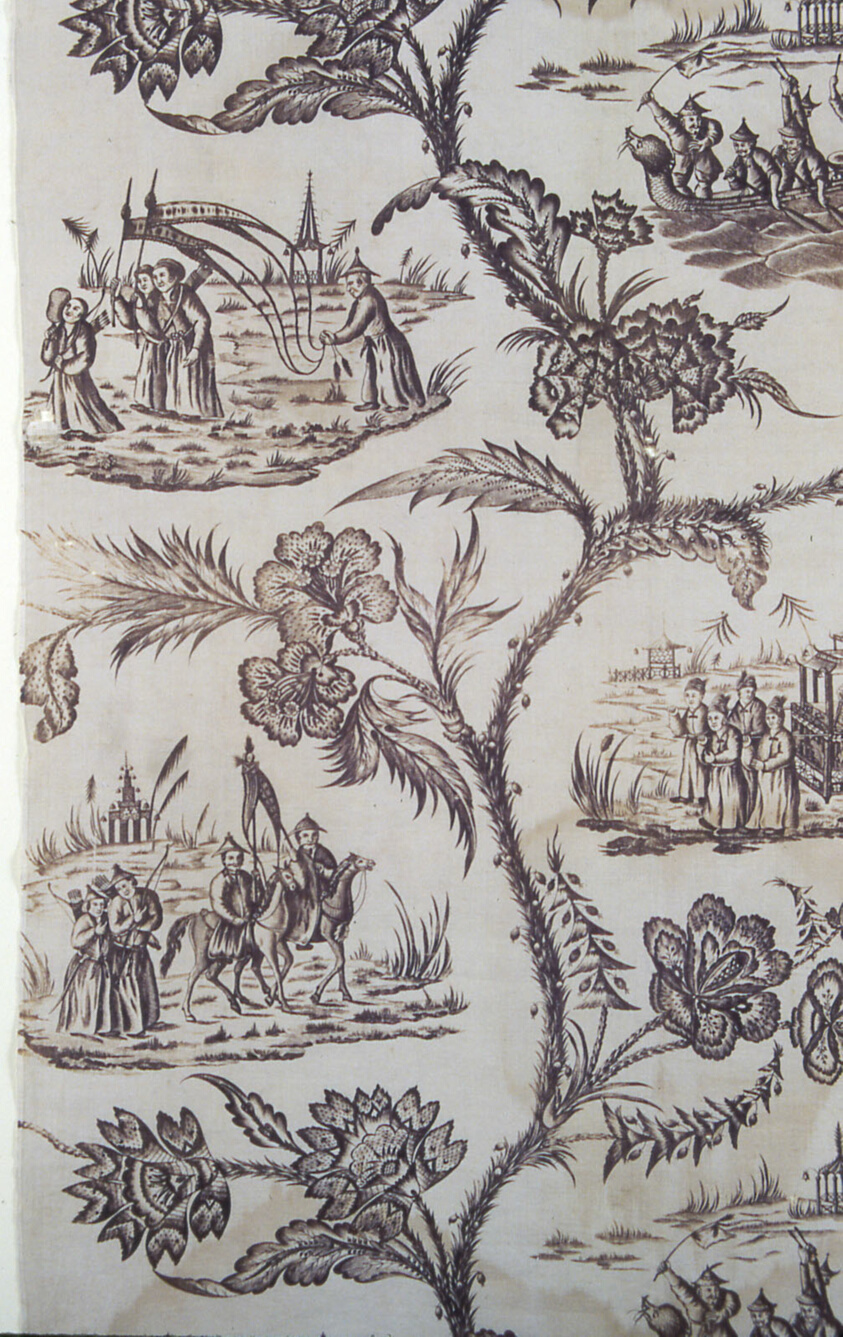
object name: Textile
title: Panel (Furnishing Fabric)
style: chinoiserie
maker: England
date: c. 1770/80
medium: Linen and cotton, plain weave; copperplate printed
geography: England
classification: textile; weaving - printed; furnishing textile